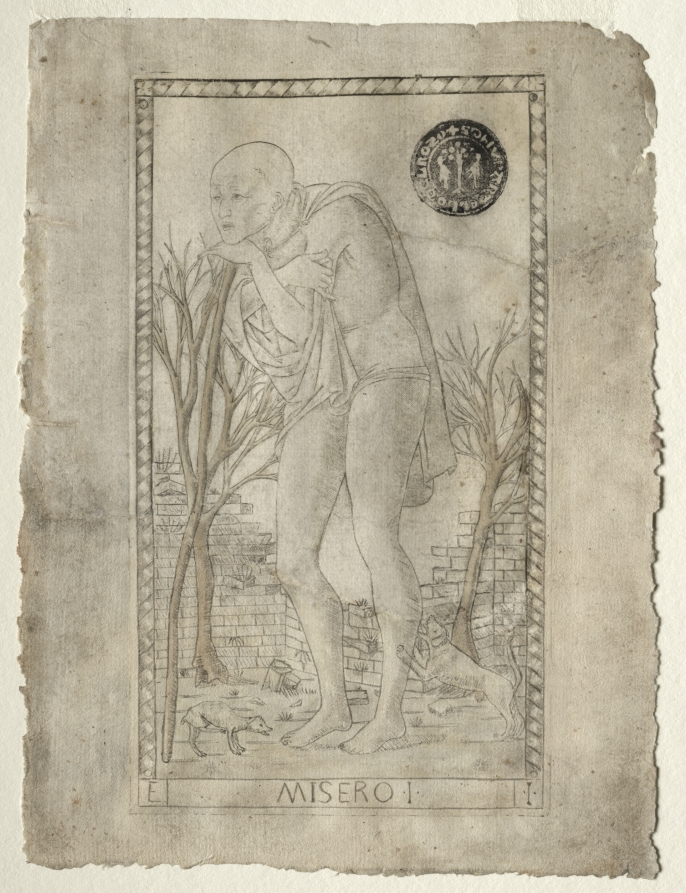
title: The Beggar (from the Tarocchi, series E: Conditions of Man, #1)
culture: Italy, Ferrara, 15th century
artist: Master of the E-Series Tarocchi (Italian, active 1460s)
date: before 1467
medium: engraving hand-colored with gold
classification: Print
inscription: Lettered below the image of Misero (The Beggar): E / MISERO / I / 1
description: This engraving is part of the Tarocchi group marked with the letter “E,” and named Conditions of Man. This series outlines the social and hierarchical order of ten characters (Beggar, Servant, Artisan, Merchant, Gentleman, Knight, Doge, King, Emperor, and Pope), starting from the lowest grade of society and ending with the most important one. Here, Misero (The Beggar) is shown as a full-length male figure, standing in three-quarter profile to the left, and set in an abandoned landscape. Barely covered by a short cloak, the mendicant rests on his staff, whilst two playful dogs keep him company. Aside from the large, disfiguring collector's stamp in the top right corner, the bottom third of this sheet has been lost and replaced. Then someone carefully drew in the lower portion of the figure with pen and ink, copying the image and even including a false platemark.